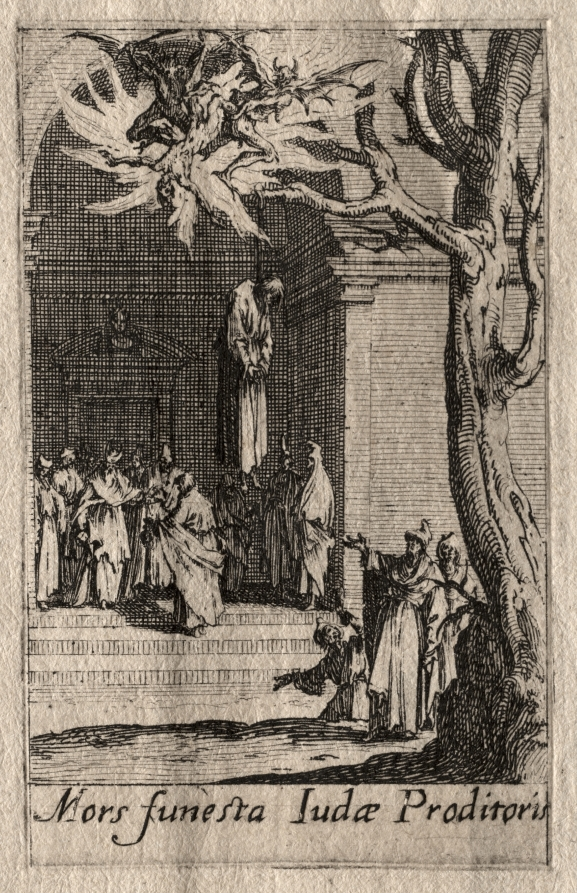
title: The Martyrdom of the Apostles: The Death of Judas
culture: France, 17th century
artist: Jacques Callot (French, 1592–1635)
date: ca. 1632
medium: etching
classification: Print